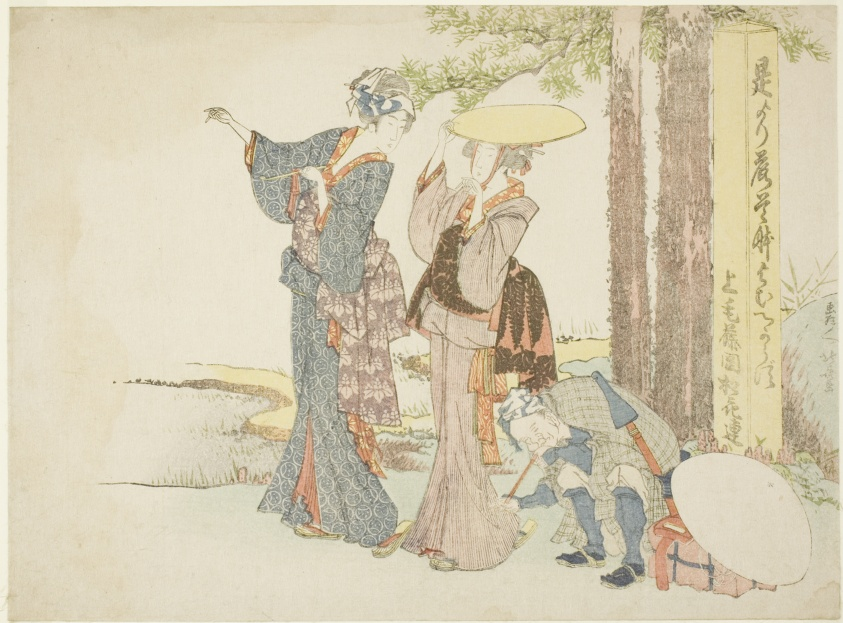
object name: Print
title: Travelers stopping at a mile post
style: Japanese (culture or style)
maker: Katsushika Hokusai 葛飾 北斎; Japanese, 1760-1849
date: c. 1805/06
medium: Color woodblock print; surimono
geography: Japan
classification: woodblock print; print; asian art